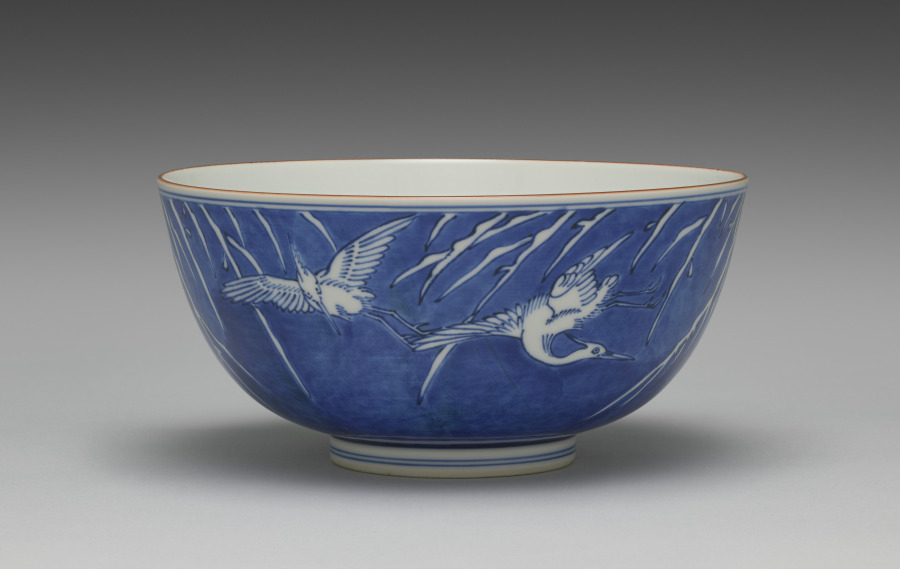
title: Sweets Bowl with Egrets and Willow in Snow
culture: Japan, Meiji period (1868–1912)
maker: Seifū Yohei III (Japanese, 1851–1914)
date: 1912–14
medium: Porcelain with underglaze blue and iron oxide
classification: Ceramic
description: For this sweets bowl, Yohei III designed a dramatic surround of egrets in a willow tree under heavy snow. The entire design is painted in cobalt blue under the transparent glaze. If one turns the bowl clockwise, two egrets come into view, one after the other. As they ascend, both struggle against the wind amid snow-laden weeping willow branches. They are followed by a stretch of willow branches that evoke the bitter cold. The sky is painted with blue washes all around the designs. The imagery culminates in a group of three egrets huddled together in the crotch of the tree. Of course, it is also possible to read the scene in the other direction, in which case the sheltering egrets look toward one of the flying egrets, who looks back at them, and it is the egret with wings outspread, looking directly down, who concludes the scene. Two thin bands of blue set off the design just under the bowl’s rim, and a band of brown iron oxide runs along the rim. Another two bands of blue run around the middle of the foot. The inside of the bowl’s box lid has an attestation by Yohei IV that it is the work of Yohei III.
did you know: This sweets bowl requires someone to rotate it to experience the birds observing one another.